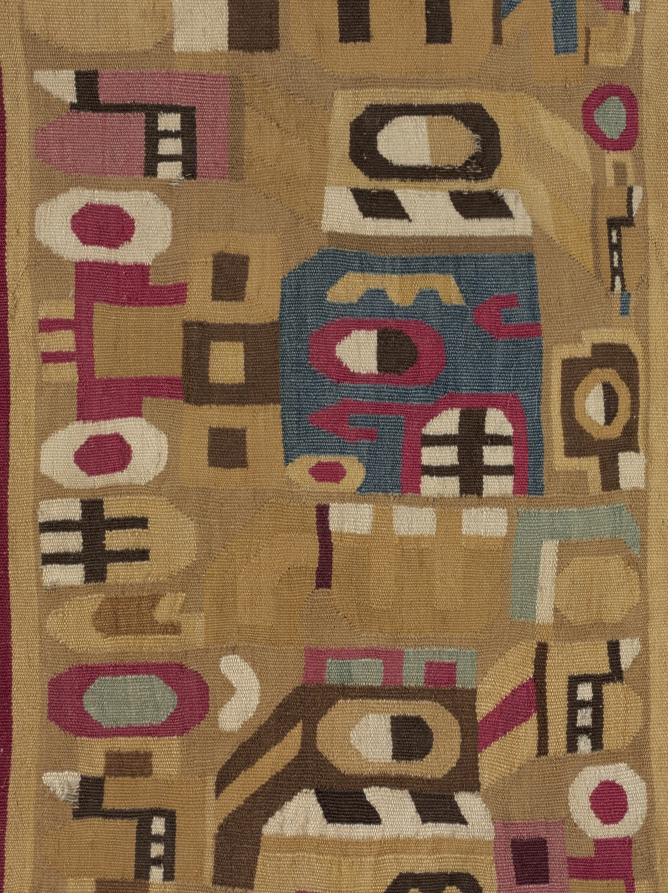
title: Tunic with Sacrificer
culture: South America, Peru, Central Andes, Middle Horizon, Wari people, 7th-11th century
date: 600–1000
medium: camelid-fiber, cotton; tapestry weave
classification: Textile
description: An extremely abstract supernatural sacrifice repeats in different colors and orientations across the body of this tunic, which was shortened on one side in antiquity. Look for the toothy black-and-white mouth in the sacrificer's upward-gazing head; other facial features include a button nose and a vertically divided eye. The figure holds the L-shaped haft of an axe behind its back and, at the front of its body, a short staff with a severed, upside-down human head on the top.